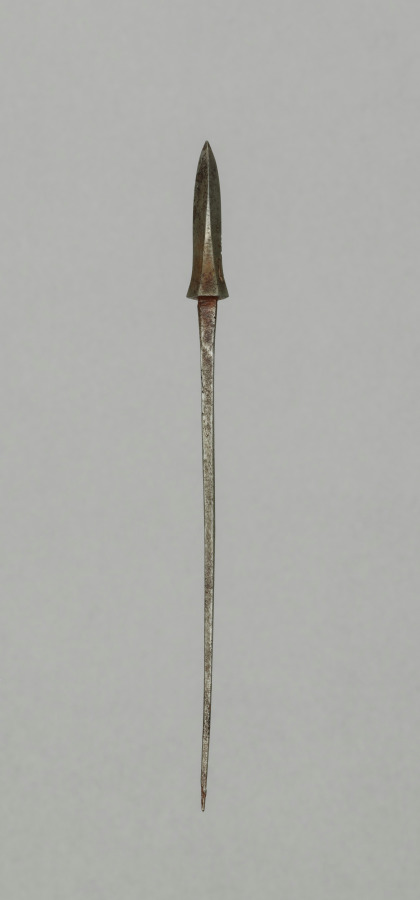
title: Arrow Point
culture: Japan, Edo period (1615–1868)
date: 1700s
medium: steel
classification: Arms and Armor